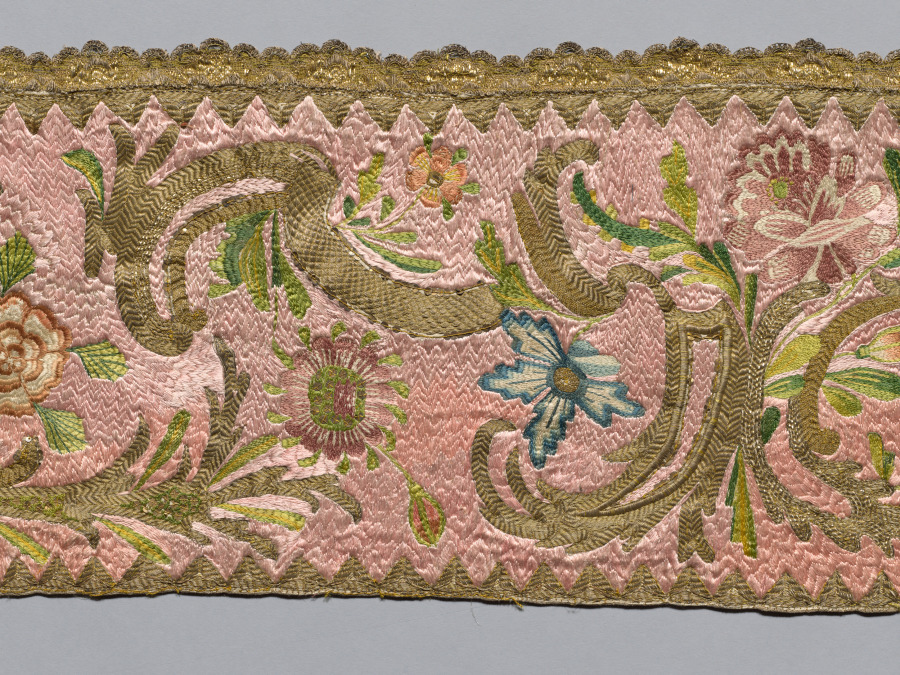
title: Embroidered Strip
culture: Italy, 18th century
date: 1700s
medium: embroidery, silk and gold thread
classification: Embroidery